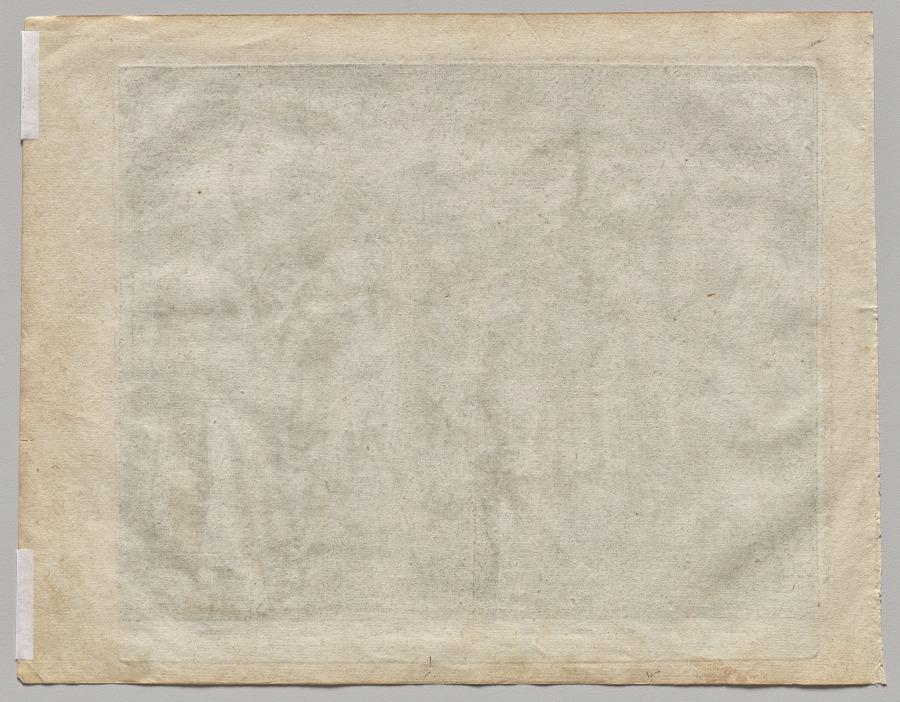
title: The Seed Falling among the Stones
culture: Netherlands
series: Parable of the Sower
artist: Philip Galle (Flemish, 1537–1612)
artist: after Gerard van Groeningen (Flemish)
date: 1574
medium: engraving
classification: Print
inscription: Watermark not identified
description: This is one of a series of four prints portraying the biblical parable of the sower, made in Antwerp (in present-day Belgium) at the end of the 1500s. The parable compares types of soil to people in the world: one hardened; one fickle; one distracted by things of the world; and one with an open heart, ready to accept God. In this image of the fickle sower, the seed cannot grow among the stones because the man turns away when challenged by religion (represented as a standing figure with a cross). He is accompanied by two more figures representing Fear and Weakness.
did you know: The figure representing religion in this image is described specifically as “Persecution,” implying some of the religious troubles during the Protestant Reformation.